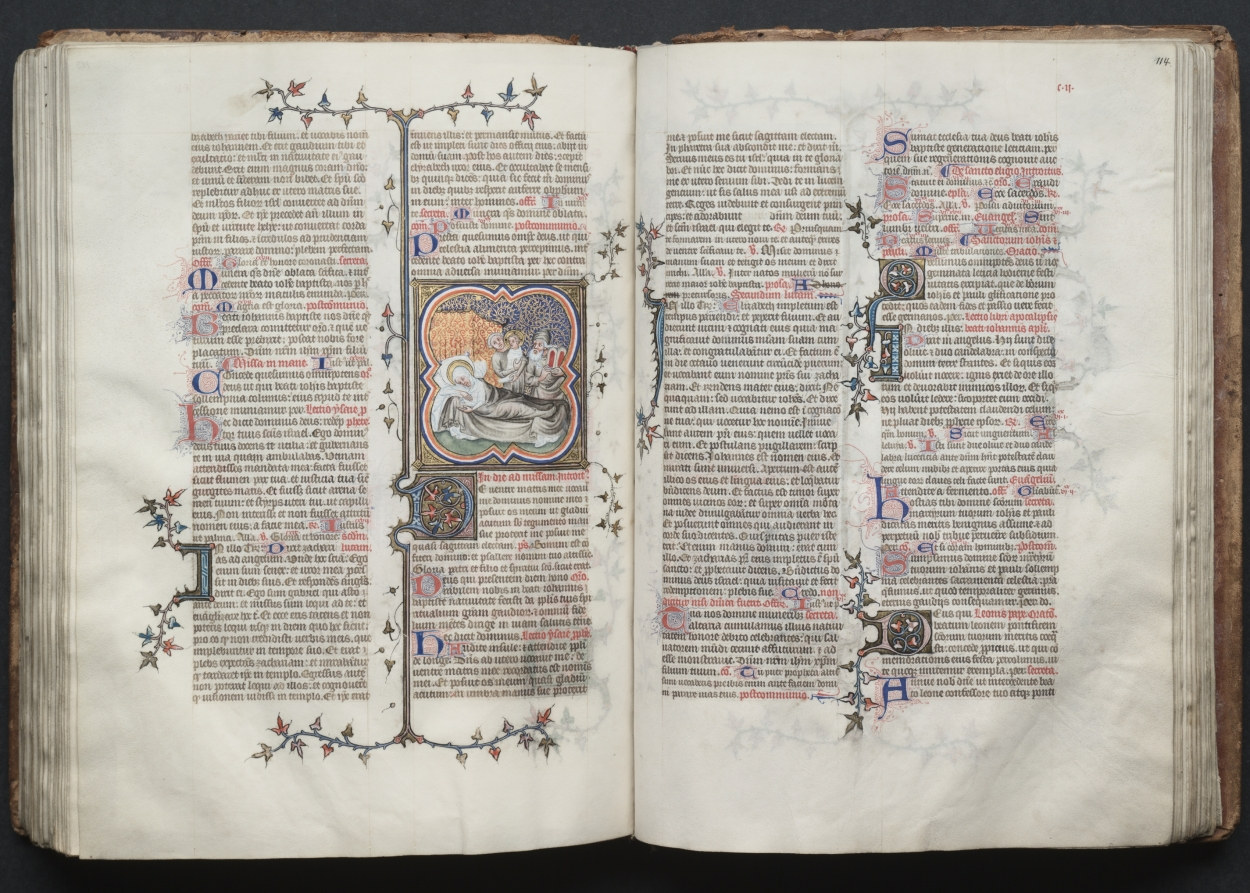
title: The Gotha Missal: Fol. 114r, Text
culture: France, Paris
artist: Master of the Boqueteaux (French)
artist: and Workshop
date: c. 1375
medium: ink, tempera, and gold on vellum; blind-tooled leather binding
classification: Bound Volume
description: The style and quality of this manuscript's decoration is typical of deluxe Parisian books made for aristocratic or royal patrons. Most of the book's decoration appears to be the work of the Master of the Boqueteaux, an artist active at the court of King Charles V (died 1380). His style was apparently shared by a number of book illuminators working in and around Paris. It is very possible that the Gotha Missal belonged to Charles V, but is not provable because the manuscript has no royal portraits and lacks a colophon. Given the book's magnificent decoration, however, it would seem that it was produced for a Valois prince, if not for the king himself. The manuscript receives its name from the German dukes of Gotha, its later owners.